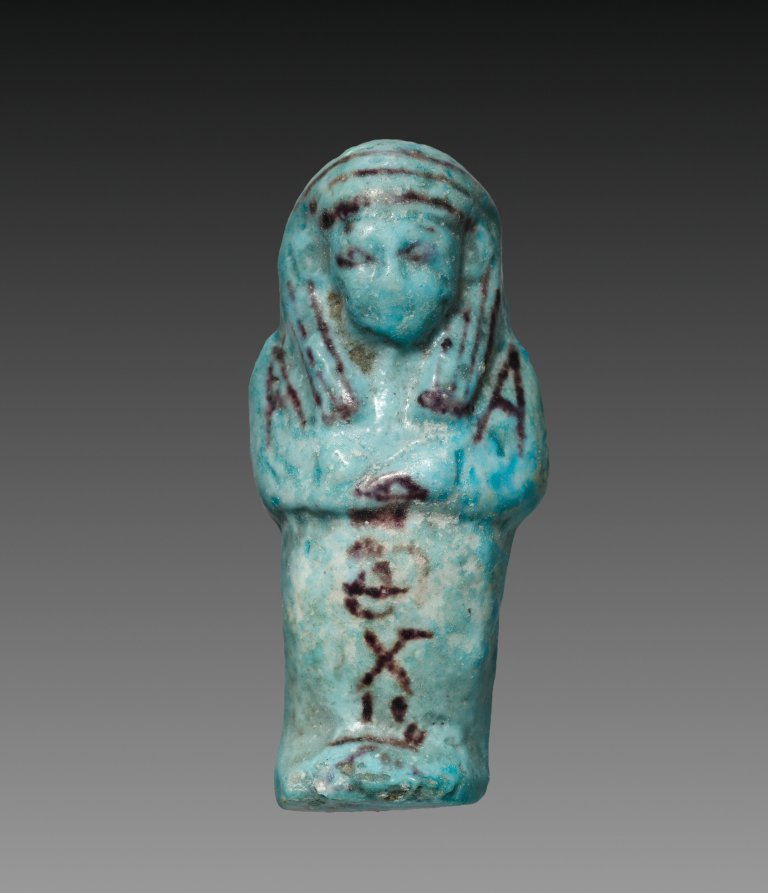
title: Shawabty of Payefadjer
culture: Egypt, Third Intermediate (1069–715 BCE), Dynasty 21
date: 1000–956 BCE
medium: turquoise faience with purple decoration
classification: Funerary Equipment